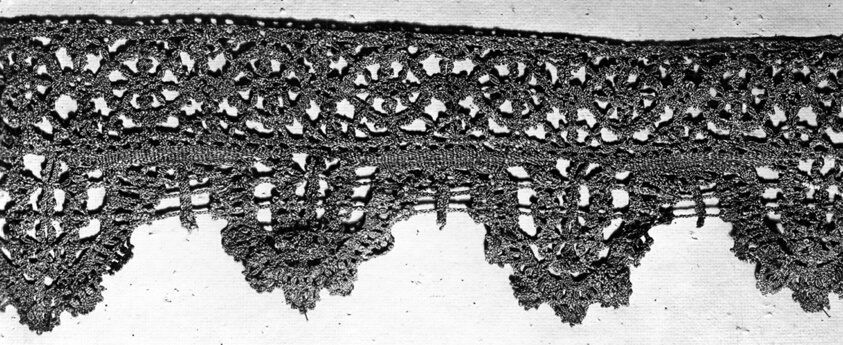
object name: Textile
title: Border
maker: Italy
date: 18th century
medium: Silk, bobbin straight lace with cloth work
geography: Italy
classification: textile; lace - bobbin